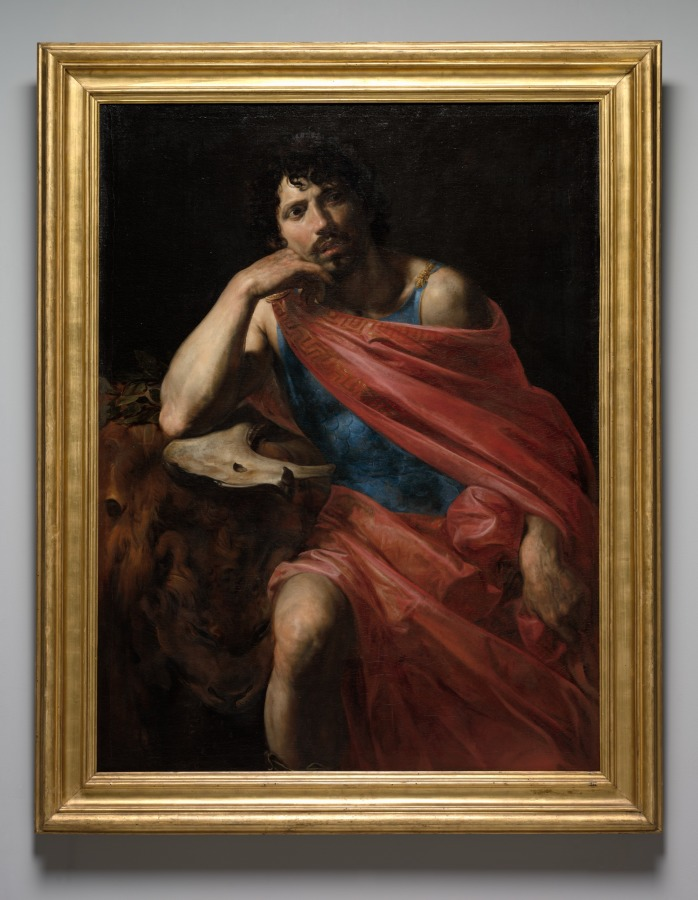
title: Samson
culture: France, 17th century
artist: Valentin de Boulogne (French, 1591–1632)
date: 1630–31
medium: oil on canvas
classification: Painting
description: The Old Testament hero Samson rests his head on his hand in a pensive, even melancholic pose. Objects on the table recall two of his heroic deeds: he killed a lion with his bare hands, and liberated the Israelites by slaughtering a thousand Philistines with a donkey’s jawbone. Samson’s cuirass, or breastplate, is joined at the shoulder by a clasp in the form of two bees—the emblem of the Barberini family, who commissioned the painting around 1630. In 1627, the Barberini had engaged Valentin to paint another biblical hero, David victorious with the head of Goliath; the canvas depicting Samson was designed to be its pendant.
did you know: The figure of Samson was likely a self-portrait of the artist.